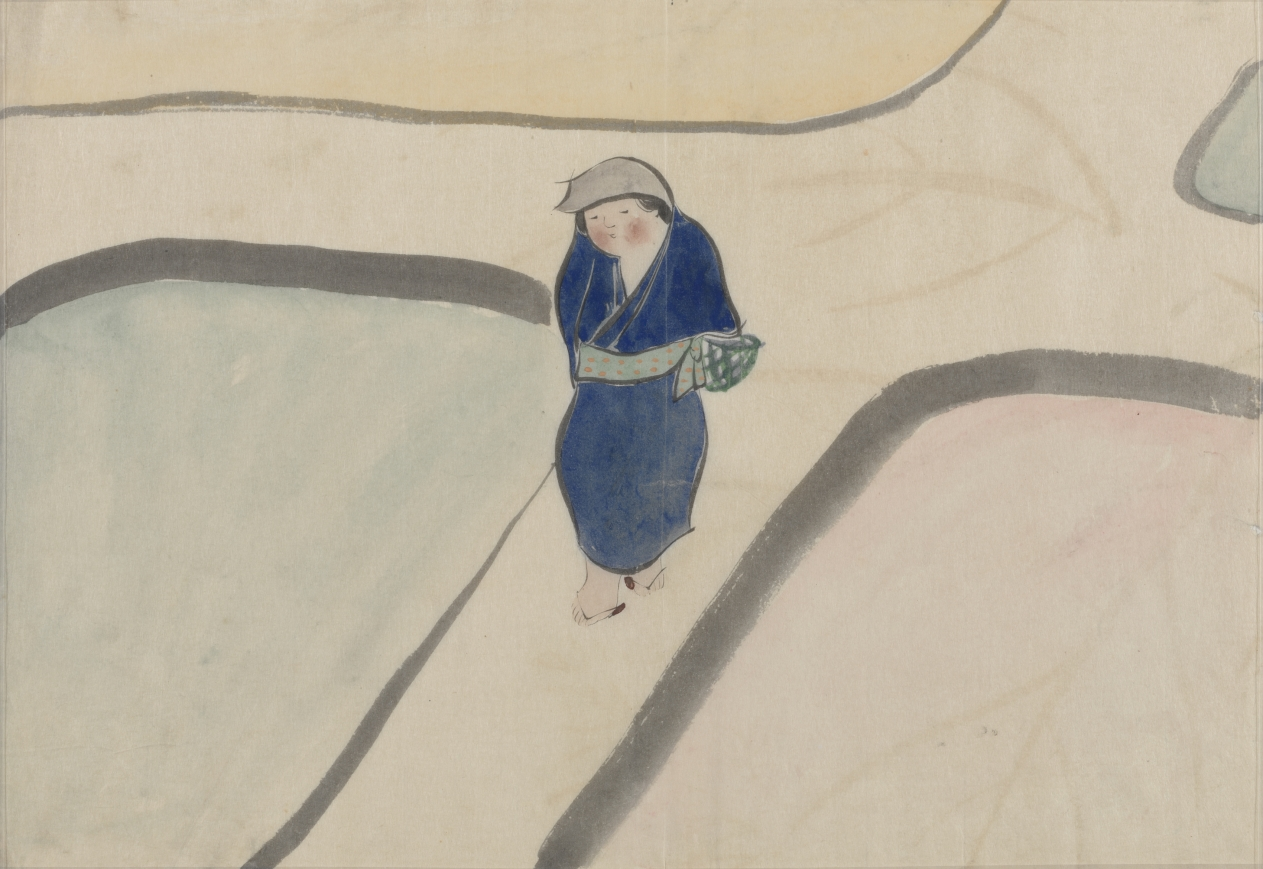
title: Flowers of a Hundred Worlds (Momoyogusa): Spring Field (Haru no tanomo)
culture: Japan, Meiji period (1868–1912)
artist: Kamisaka Sekka (Japanese, 1866–1942)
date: 1909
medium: ink and on paper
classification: Drawing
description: Kamisaka Sekka made preparatory drawings for his Flowers of a Hundred Worlds series on tracing paper with ink and color. The freehand sketches are much looser than the finished, printed compositions.